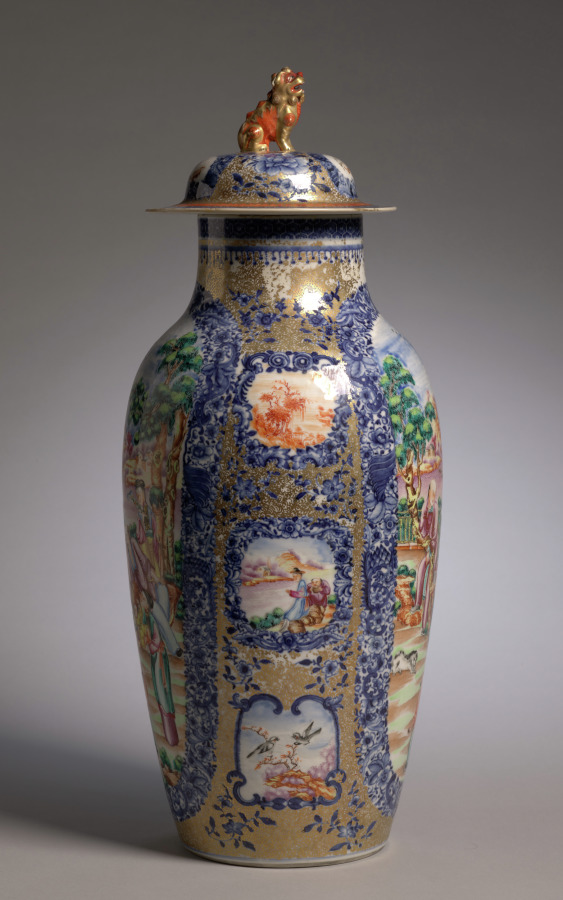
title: Covered Vase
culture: China, Chinese Export, 18th century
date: c. 1770–80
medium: porcelain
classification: Ceramic